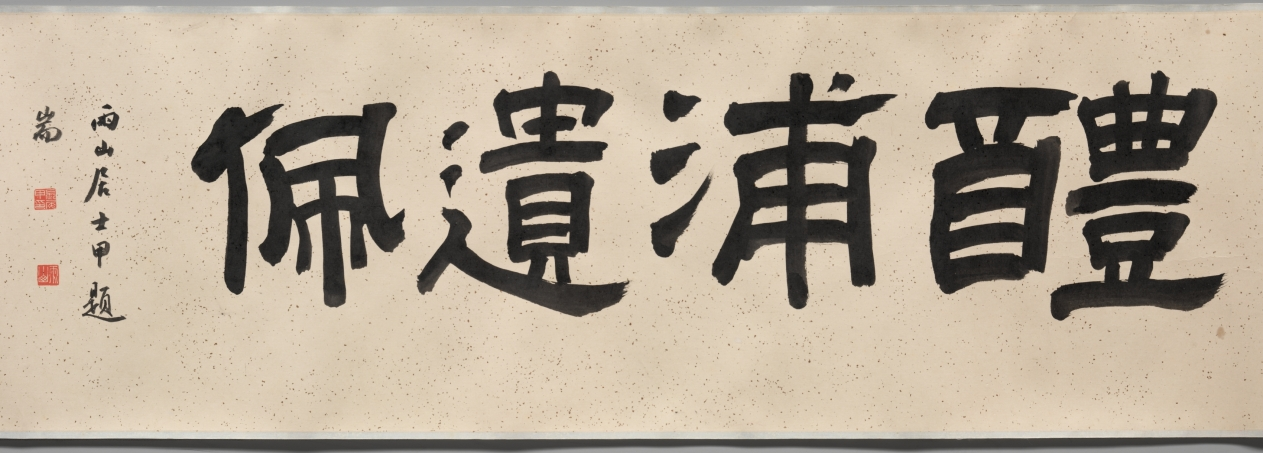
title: Rocks, Orchid, and Bamboo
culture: China, Qing dynasty (1644-1911)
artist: Shitao (Chinese, 1642–1707)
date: 1662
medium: handscroll; ink on paper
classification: Painting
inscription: Title colophon in four characters with signature and two seals on gold-flecked paper.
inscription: Artist's signature, inscription (with date of 1662), five seals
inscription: Colophon with two seals.